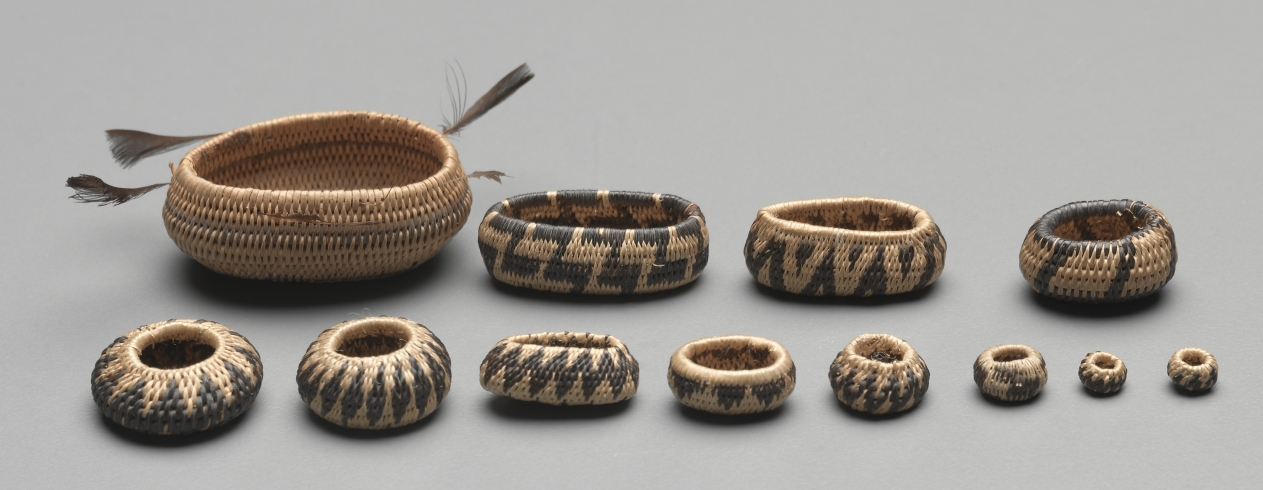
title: Miniature Round Basket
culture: California, Pomo, 20th century (?)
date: early 1900s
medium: coiled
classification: Basketry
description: Miniature baskets were made to demonstrate the basket maker’s virtuoso skill; these tiny marvels seem to be no exception—the smallest are just a few millimeters wide but still patterned. Such fine work required dexterity both in weaving and in harvesting and preparing the plant materials used to create the basket.